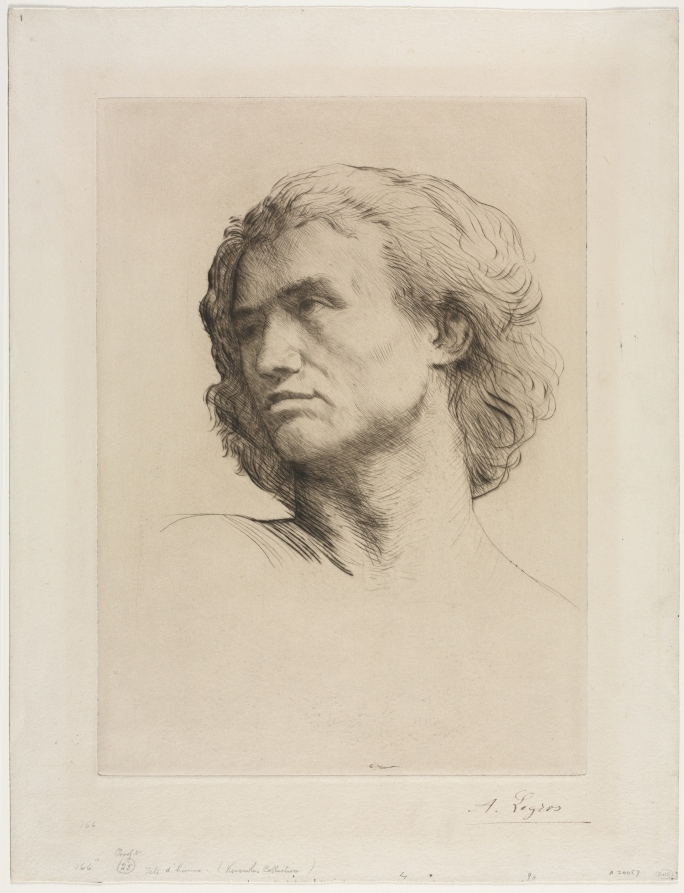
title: Head of a Man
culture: France, 19th century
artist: Alphonse Legros (French, 1837–1911)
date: c. 1857–1911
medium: drypoint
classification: Print